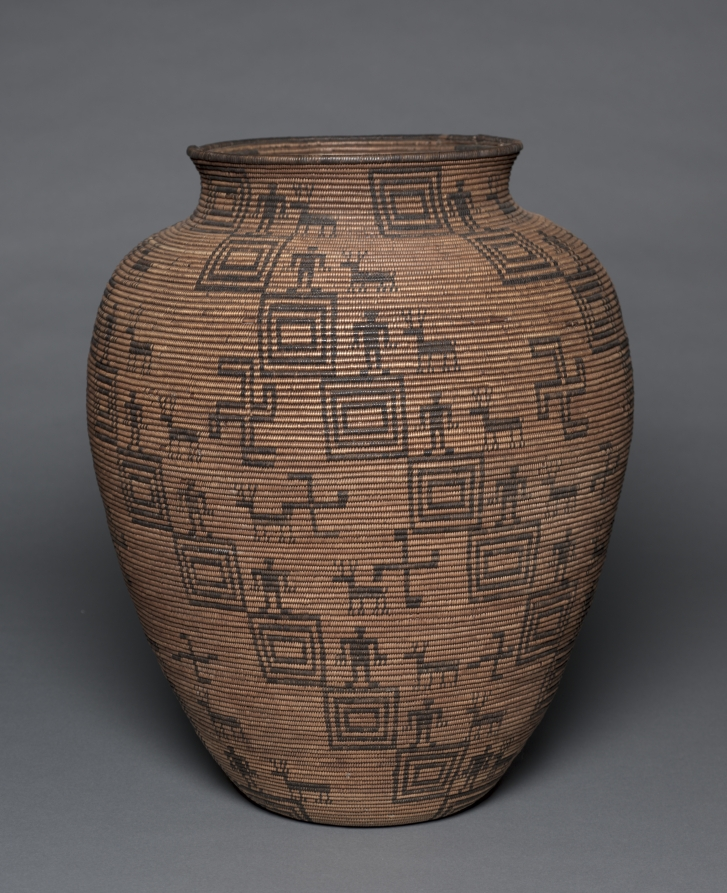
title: Olla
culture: Southwest, Apache, Western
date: Late 1800s - 1900s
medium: basket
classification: Basketry